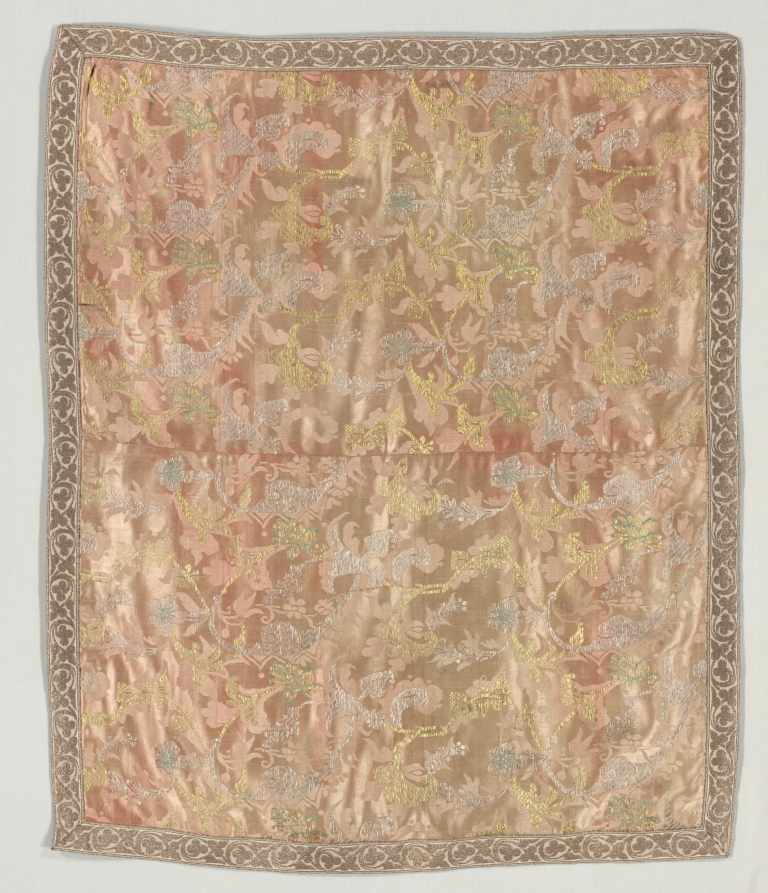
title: Table Cover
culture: Italy, 18th century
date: 18th century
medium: brocade; silk and metal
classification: Textile